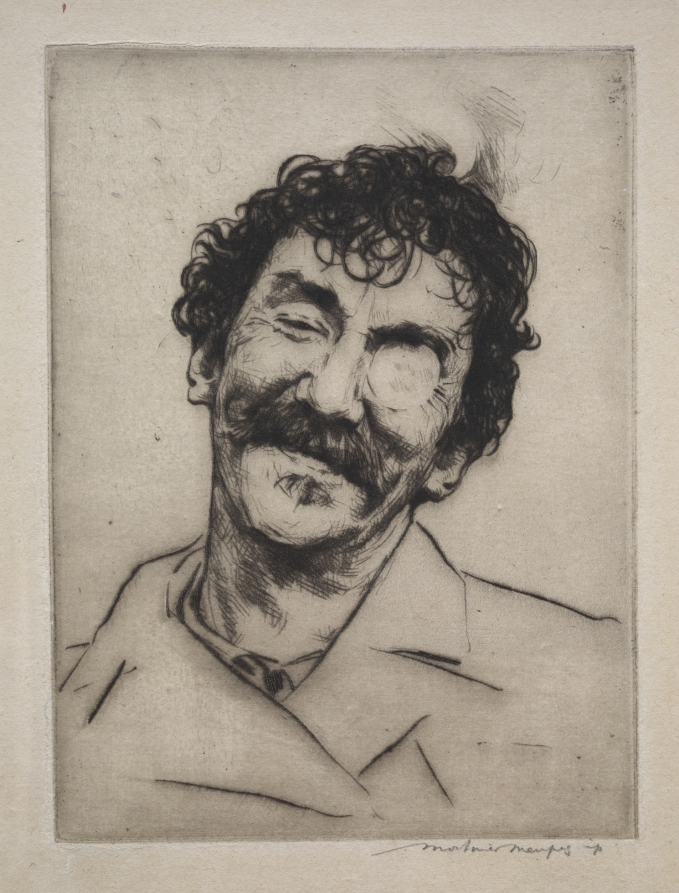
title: James MacNeill Whistler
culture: England, 19th-20th century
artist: Mortimer Menpes (British, 1860–1938)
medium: drypoint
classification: Print